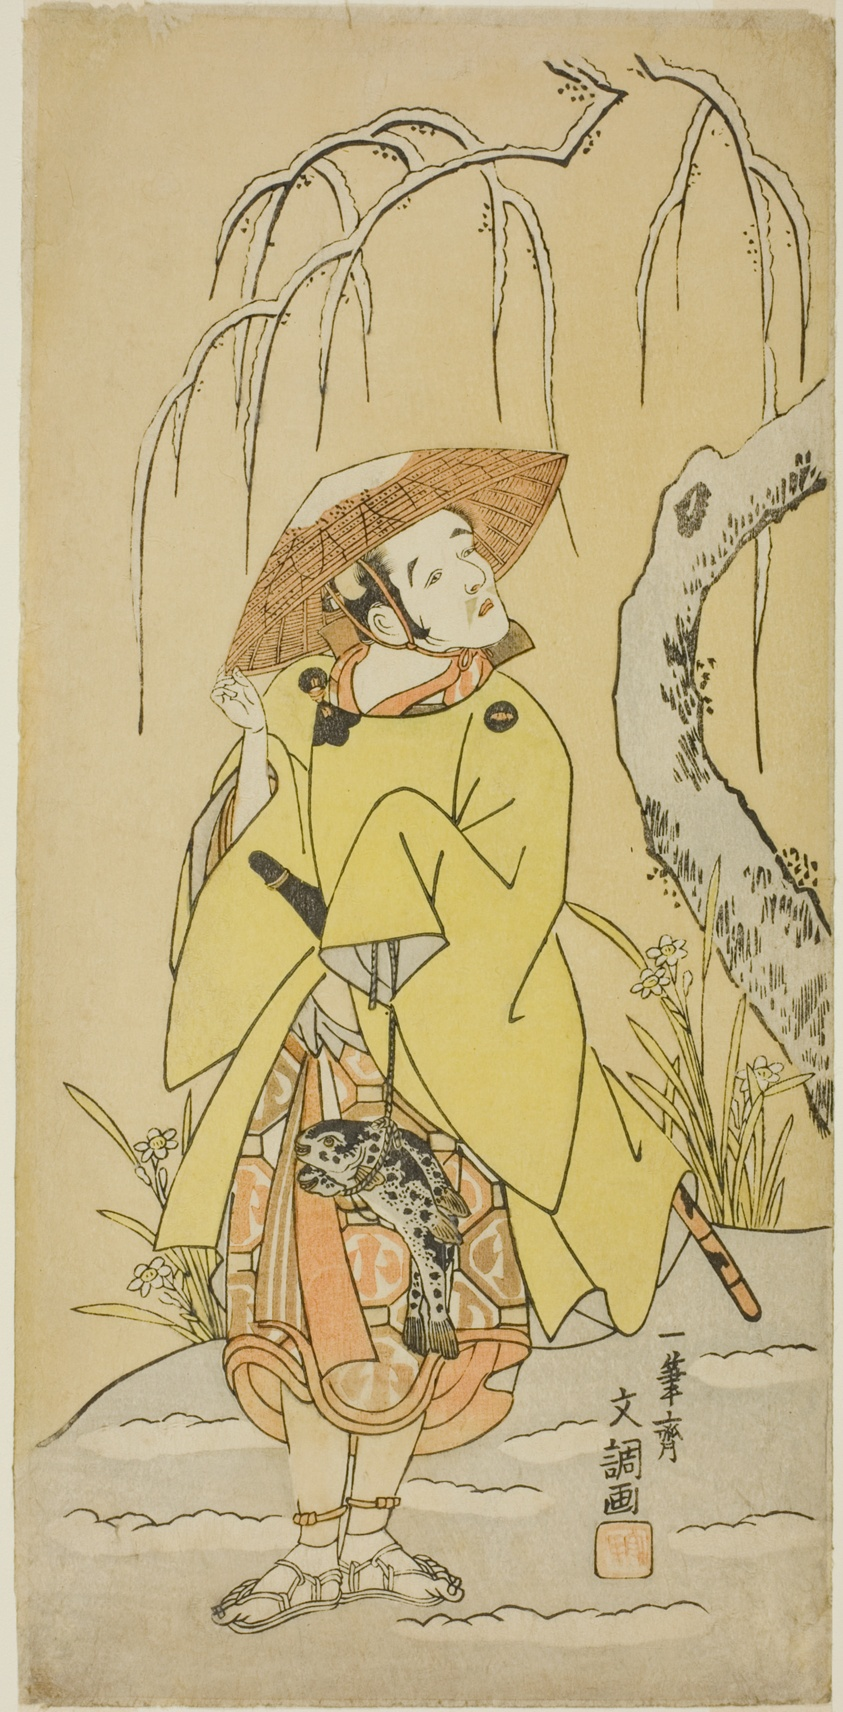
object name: Print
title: The Actor Arashi Otohachi I as Numataro, the Retainer of Utou Yasukata, in Part Two of the Play Kogane no Hana Gaijin Aramusha (Gold Flowers: The Triumphal Return of Fierce Warriors), Performed at the Nakamura Theater from the First Day of the Eleventh Month, 1766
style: Japanese (culture or style)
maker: Ippitsusai Buncho (Japanese, active c. 1755-90)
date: c. 1766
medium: Color woodblock print; hosoban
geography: Japan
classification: woodblock print; print; asian art